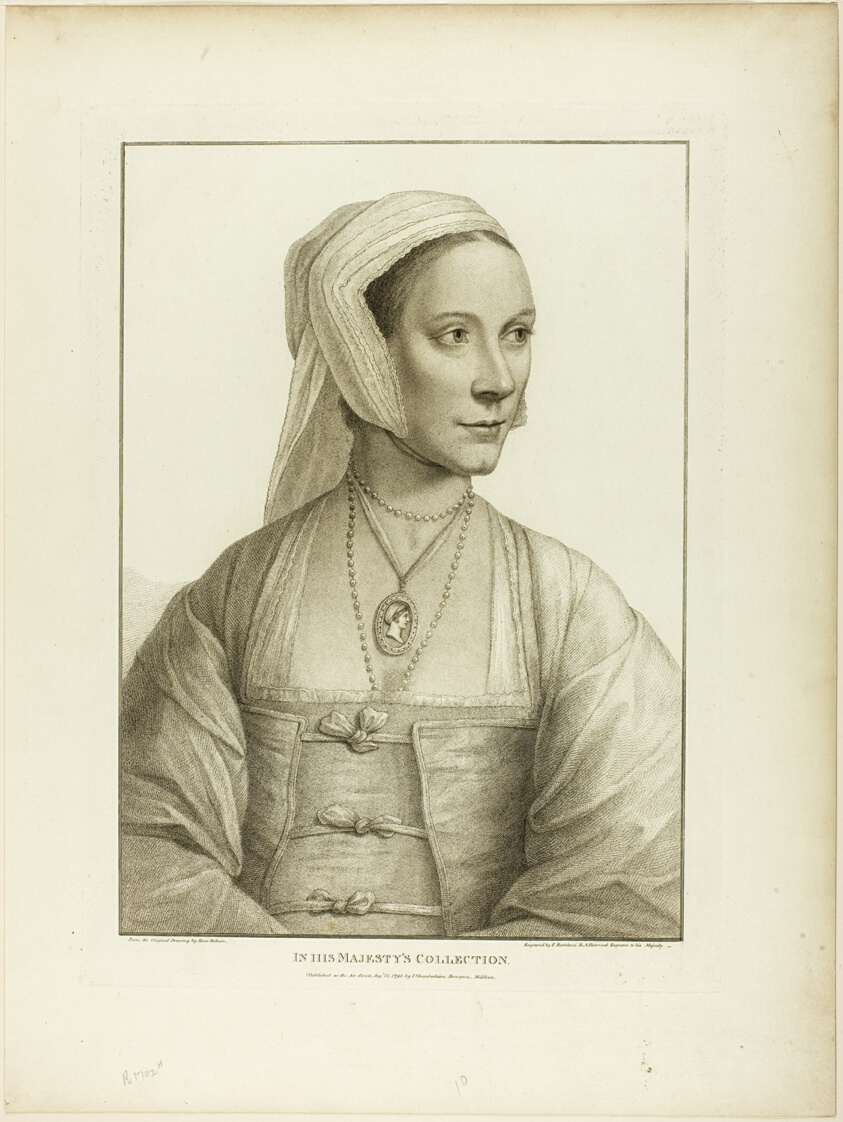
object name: Print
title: Portrait of a Woman Facing Right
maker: Francesco Bartolozzi (Italian, 1727-1815); after Hans Holbein the younger (German, 1497-1543)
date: 1798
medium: Stipple engraving on cream wove paper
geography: Italy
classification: engraving; print; prints and drawing